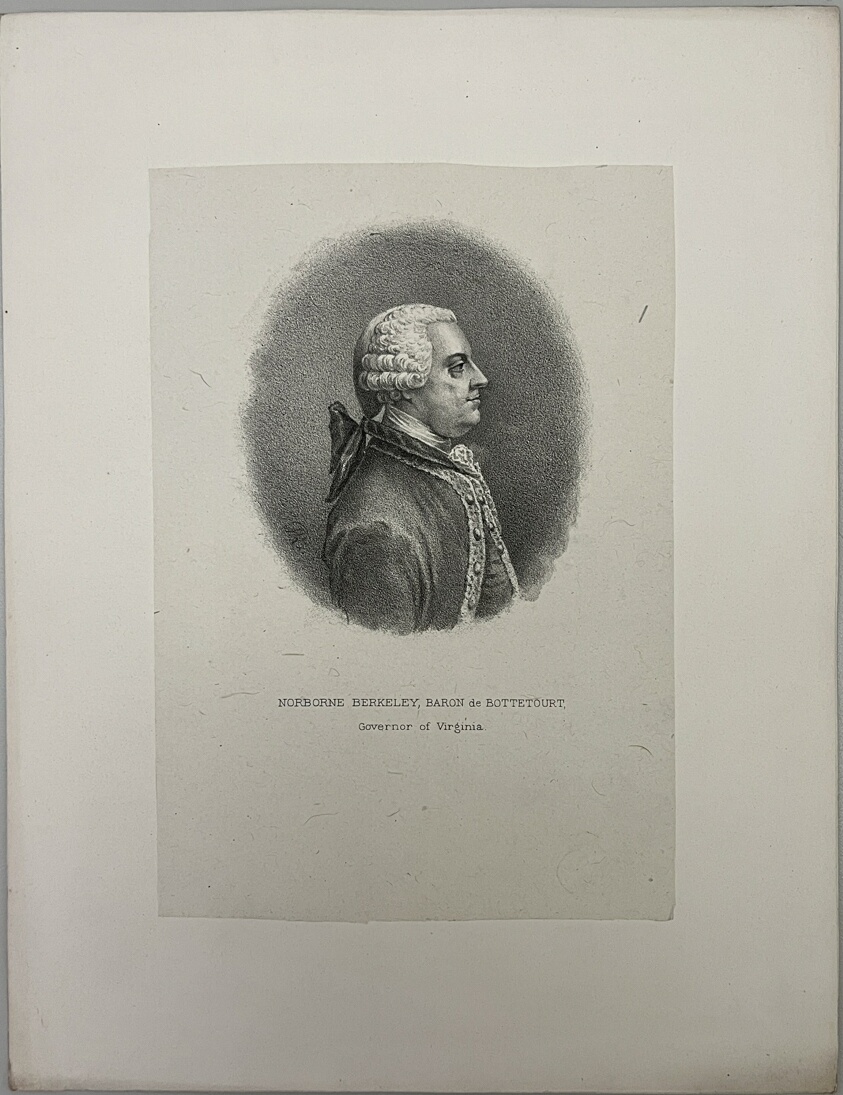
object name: Print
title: Norborne Berkeley, Baron de Bottetourt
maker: Artist Unknown (Likely American or British, 19th century)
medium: Lithograph on paper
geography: United States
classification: reproduction; print; prints and drawing